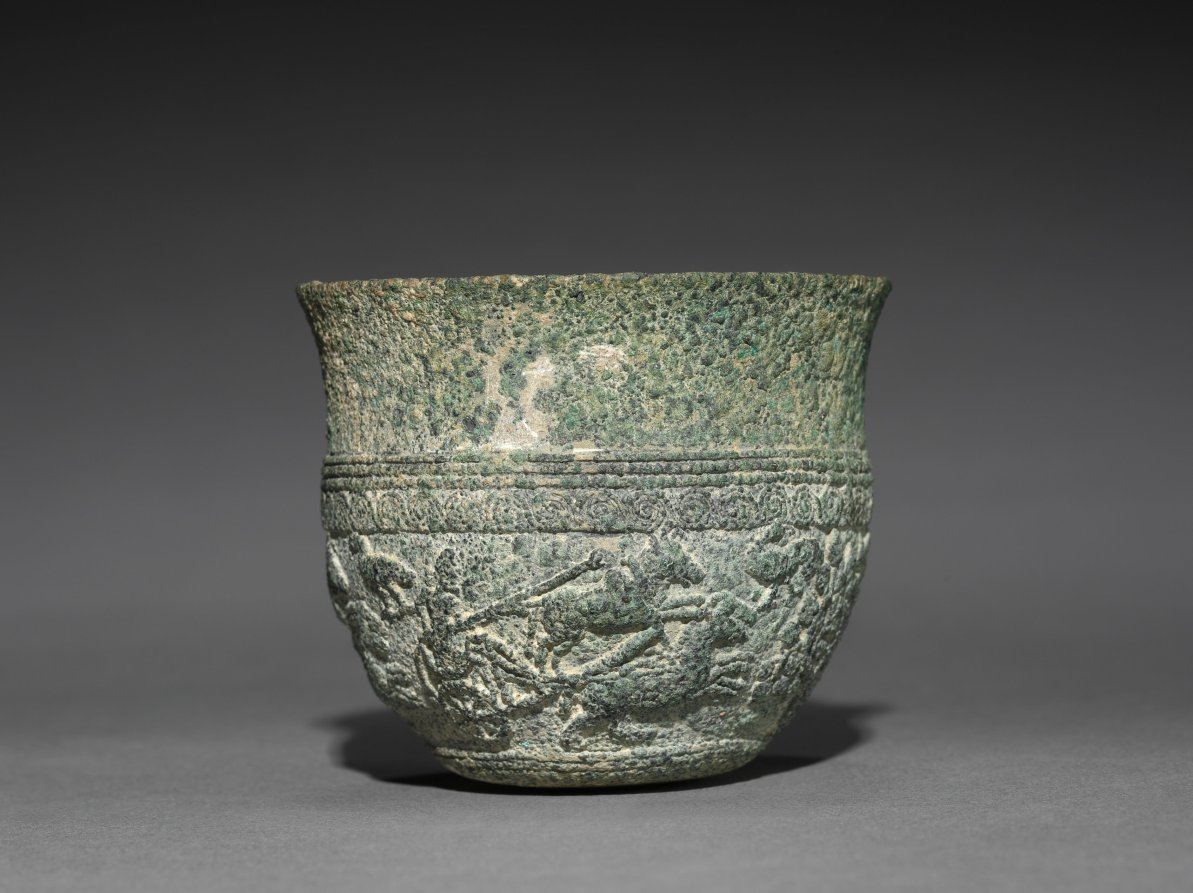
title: Libation Cup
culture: India, Maurya period (322–185 BCE)–Shunga period (185–78 BCE)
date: c. 235–185 BCE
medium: bronze, lost wax technique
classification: Metalwork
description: The remarkably clear, tiny carvings in an uninterrupted frieze around the lower section include one sacred palm tree and one fig tree (ficus religiosa) that divide the space into two main scenes. One features female musicians, the other has two chariots, each drawn by a pair of galloping horses. Bulls, birds, and flowers fill the background spaces. This cup is from a group found in an area with close links to Indo-Greek kingdoms, and the chariots and framing motifs reveal knowledge of Hellenistic art.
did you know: The tree carved into the cup is of the same species as the Bodhi tree, under which the Buddha reached enlightenment.